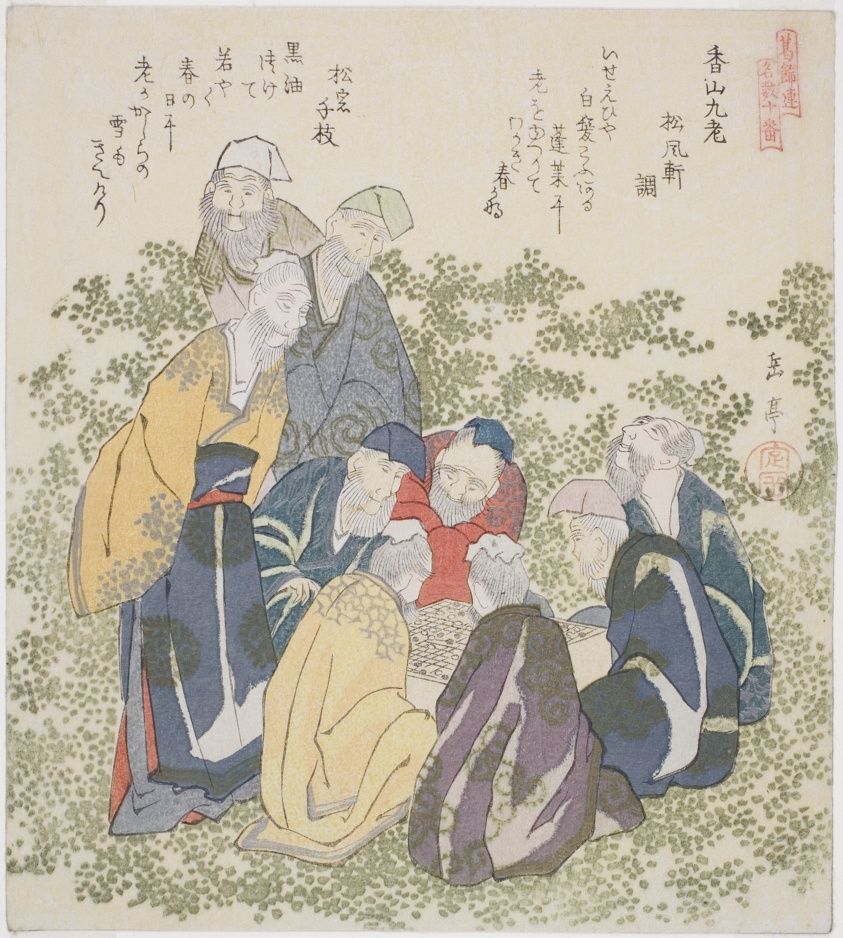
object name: Print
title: The Nine Old Men of Mount Xiang (Kozan kyuro), from the series "A Set of Ten Famous Numbers for the Katsushika Circle (Katsushikaren meisu juban)"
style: Japanese (culture or style)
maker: Yashima Gakutei (Japanese, 1786 (?)-1868)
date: c. 1828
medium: Color woodblock print; shikishiban, surimono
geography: Japan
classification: woodblock print; print; asian art